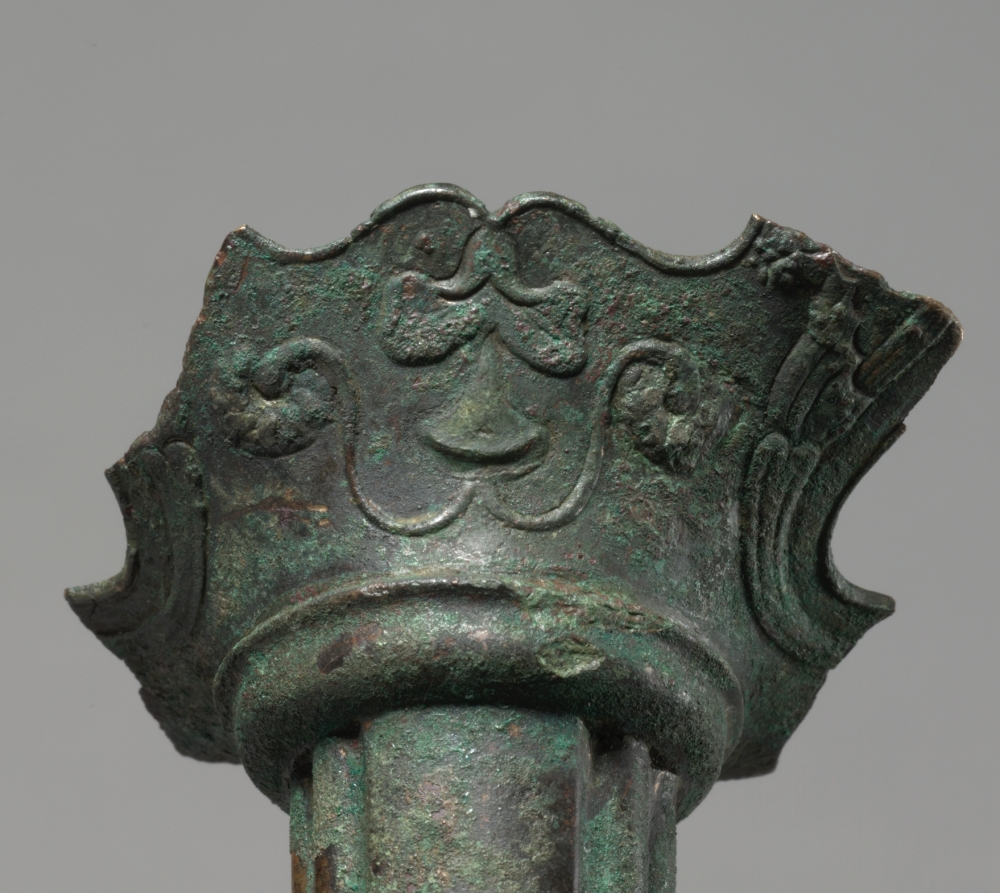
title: Patera Handle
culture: Greece, late Hellenistic period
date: 200–1 BCE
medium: bronze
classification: Metalwork